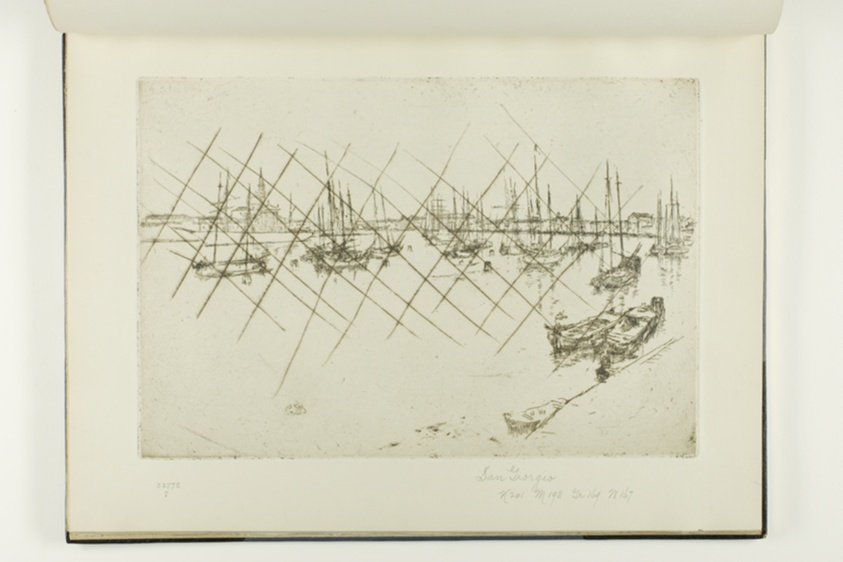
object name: Print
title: San Giorgio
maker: James McNeill Whistler (American, 1834-1903)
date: 1879/80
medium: Etching and drypoint with foul biting, with drypoint cancellation, in dark brown ink on ivory laid paper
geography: United States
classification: etching; prints and drawing; print; drypoint; foul biting; book; paper